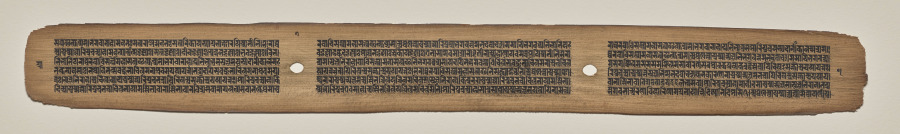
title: Text, Folio 7 (verso), from a Manuscript of the Perfection of Wisdom in Eight Thousand Lines (Ashtasahasrika Prajnaparamita-sutra)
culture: Eastern India, Bihar, Vikramashila Monastery. Painting: Nepal, Kathmandu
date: Sunday, September 14, 1119 (year 239 of the Newar Samvat in the month of Ashvina)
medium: gum tempera and ink on palm leaves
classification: Painting